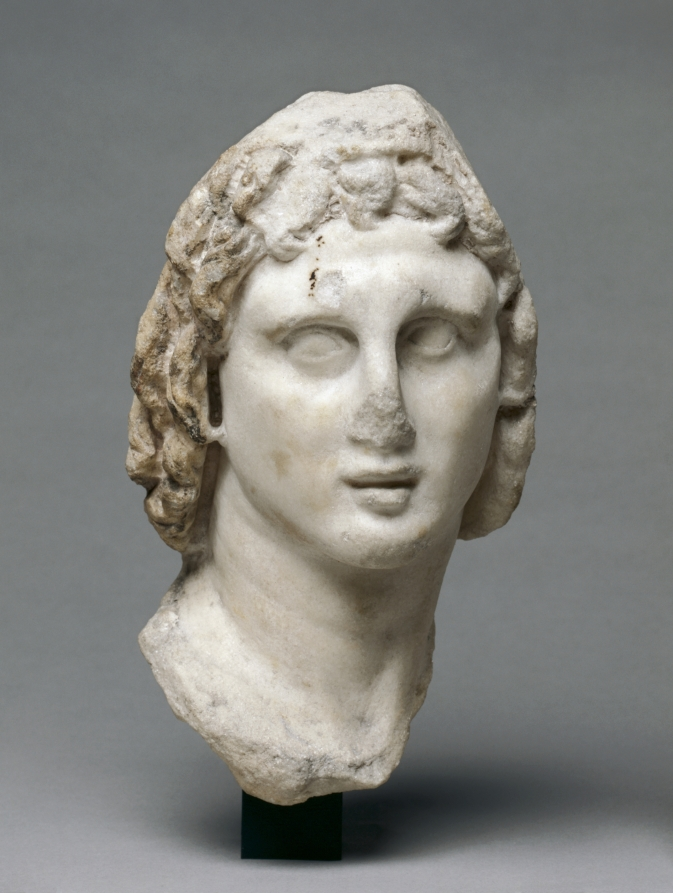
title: Head of Alexander the Great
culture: Greece, Alexandria, Hellenistic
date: 300–200 BCE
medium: marble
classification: Sculpture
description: Slightly smaller than life-size, this head of Alexander the Great features a slight turn, tilt, and upward gaze said to have characterized the young conqueror's posture in life. After his death, Alexander was worshiped as a god; posthumous portraits like this one, likely carved in Ptolemaic Egypt, portray him with long hair and youthful, idealized features.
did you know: Portraits of Alexander the Great share his characteristic anastole hairstyle, parted off-center and swept back from the forehead.